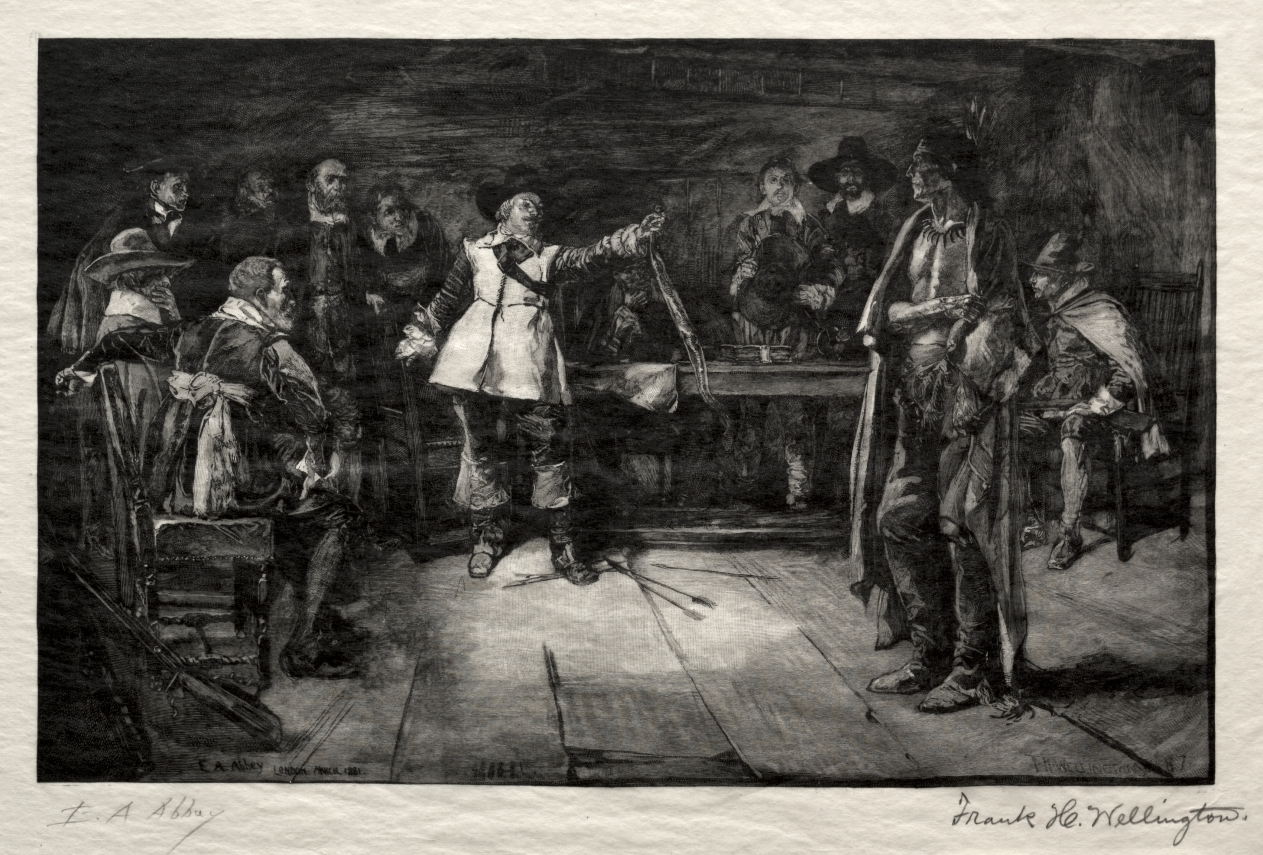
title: Miles Standish's Challenge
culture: America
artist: Frank H. Wellington (American, 1858–1911)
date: 1887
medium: wood engraving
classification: Print